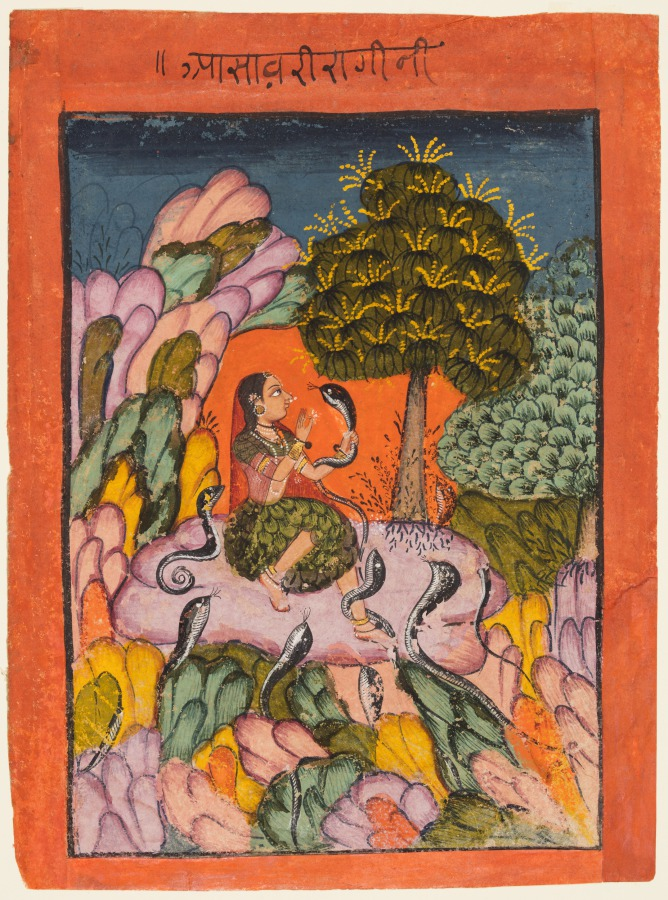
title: A Woman Charms Snakes in the Wilderness: Asavari Ragini, from a Ragamala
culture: Northwestern India, Rajasthan, Rajput Kingdom of Sirohi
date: early 1700s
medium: gum tempera and gold on paper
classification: Painting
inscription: āsāvarī rāgīnī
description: Wearing a blouse and skirt made of leaves, the heroine retains her jewelry and diaphanous veil. She speaks to a snake, and others approach, charmed by her beauty. The multiple colors used for the rocks add to the otherworldly quality of the scene, and even they seem drawn to her spiritual magnetism.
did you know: Unafraid, she offers a flower to one cobra and allows another to wind its way up her leg.